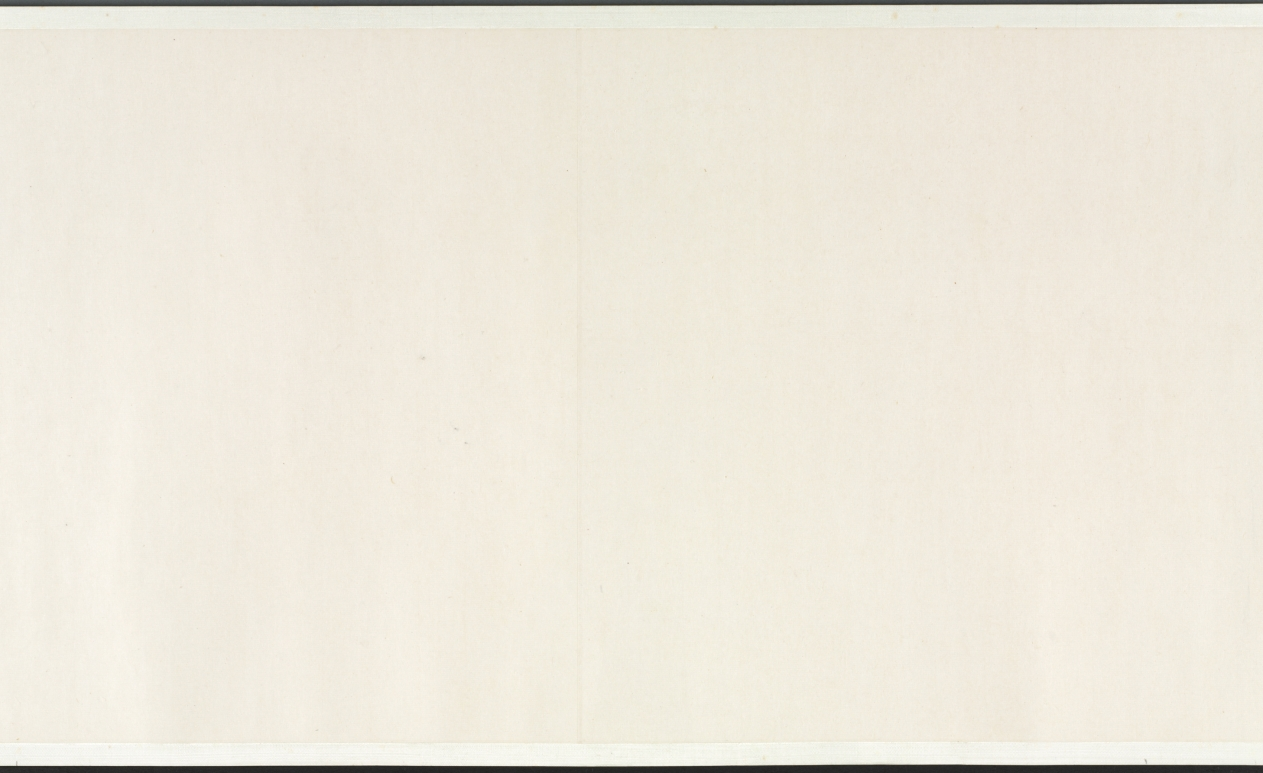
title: Buddha's Conversion of Five Bhiksu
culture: China, Yuan dynasty (1271–1368)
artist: Li Sheng (Chinese, active c. 1324–after 1375)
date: mid-1300s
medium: handscroll; ink on paper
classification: Painting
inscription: 紫篔生李升識 [印] 李氏子雲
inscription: 4 colophons and 12 additional seals: The "Heart" Sutra (Maha Prajnaparamita) text written by Wu Yuqing 吳餘慶 (active early 1400s); 2 seals of Xu Qianxue 徐乾學 (1631–1694); 3 colophons, one dated 1929 and two dated 1936, and 9 seals of Wu Hufan 吳湖帆 (1894–1968); 1 colophon, dated 1932, of Chen Dingshan; 1 seal unidentified.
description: This episode stems from the life of the historical Buddha, who, after his enlightenment, was initially hesitant about preaching his own doctrine. After much personal deliberation and prodding by deities, he finally relented. The first converts were the five guards who served him when he was still a prince. For Li Sheng, this is the pretext of the painting, which moves from the interaction of the bhiksu with the Buddha to a broader awareness of the vast surroundings of the scene.